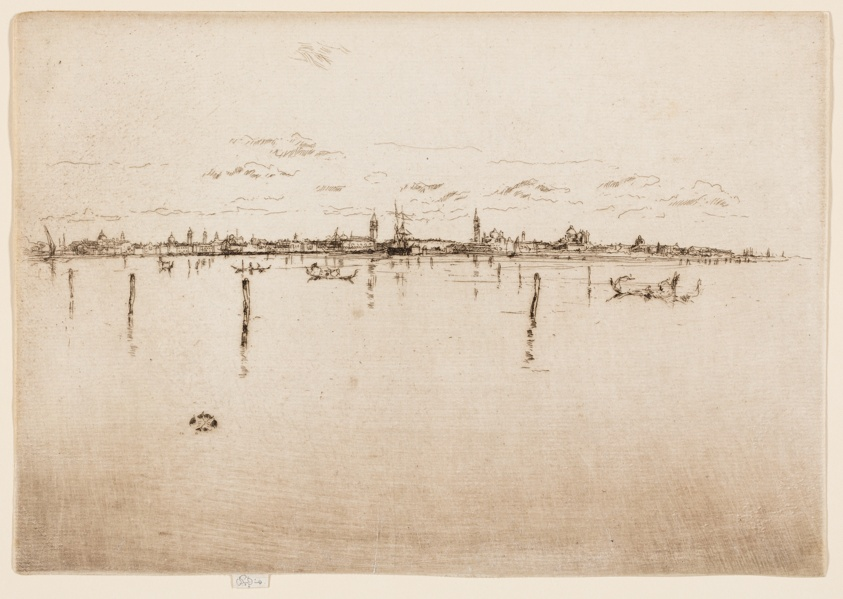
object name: Print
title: The Little Venice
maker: James McNeill Whistler (American, 1834-1903)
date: 1880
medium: Etching in warm black, with selective wiping of plate tone, on ivory laid paper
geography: United States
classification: etching; print; prints and drawing; paper